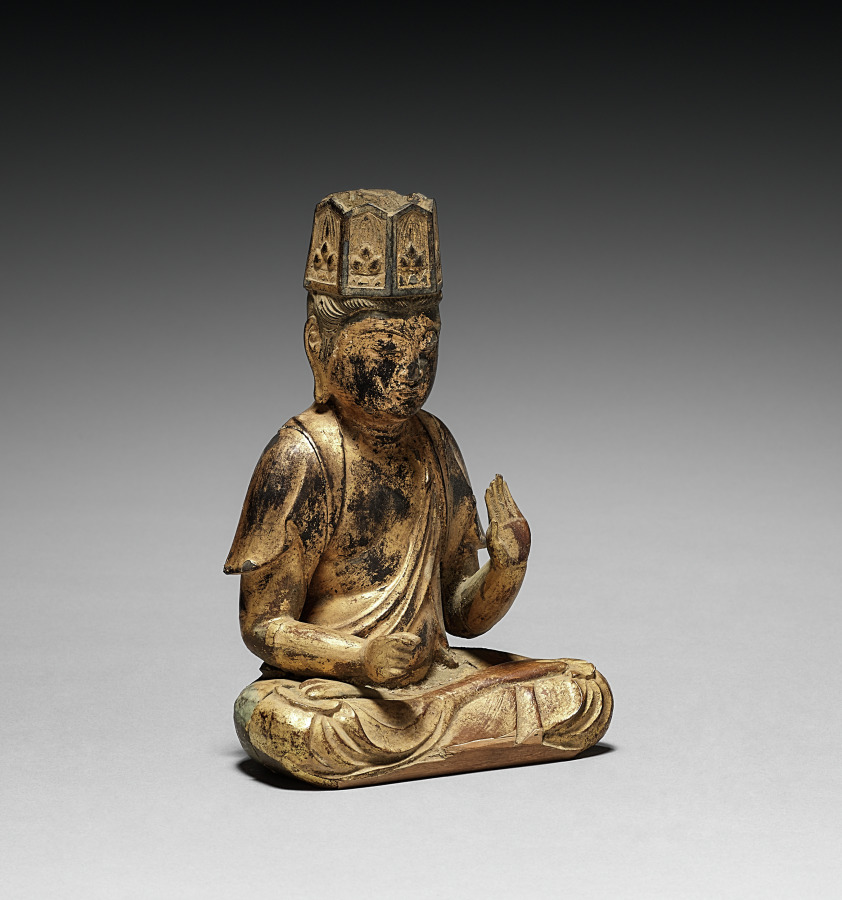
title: Bodhisattva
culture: Japan, Heian period (794–1185)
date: 900s-1100s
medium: gilded wood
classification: Sculpture